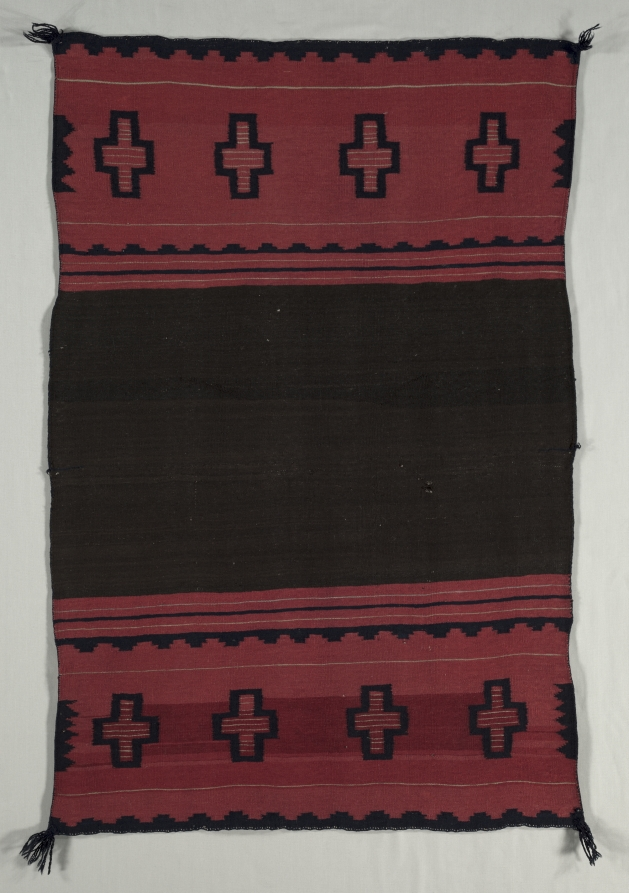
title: Woman's Dress (One Panel)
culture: America, Native North American, Southwest, Navajo, Post-Contact, Late Classic Period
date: 1870–1889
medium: tapestry weave: wool (handspun and bayeta)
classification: Textile